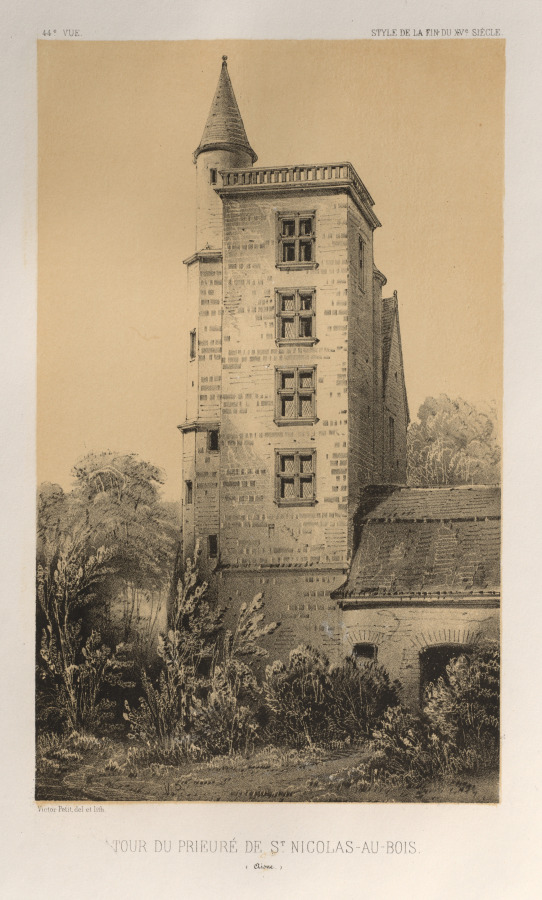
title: Architecture Pittoresque ou Monuments des xveme. Et xvieme. Siecles: Chateaux De France des XV et XVI Siecles: Pl. 44, Tour Du Prieuré De St. Nicolas-Au-Bois (Aisne)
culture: France, 19th century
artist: Victor Petit (French, 1817–1874)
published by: Charles Boivin (publisher and editor); Lith de Godard a Paris (printer)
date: 1860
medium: lithograph with tint stone, from portfolio of 100 lithographs with tint stone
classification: Print